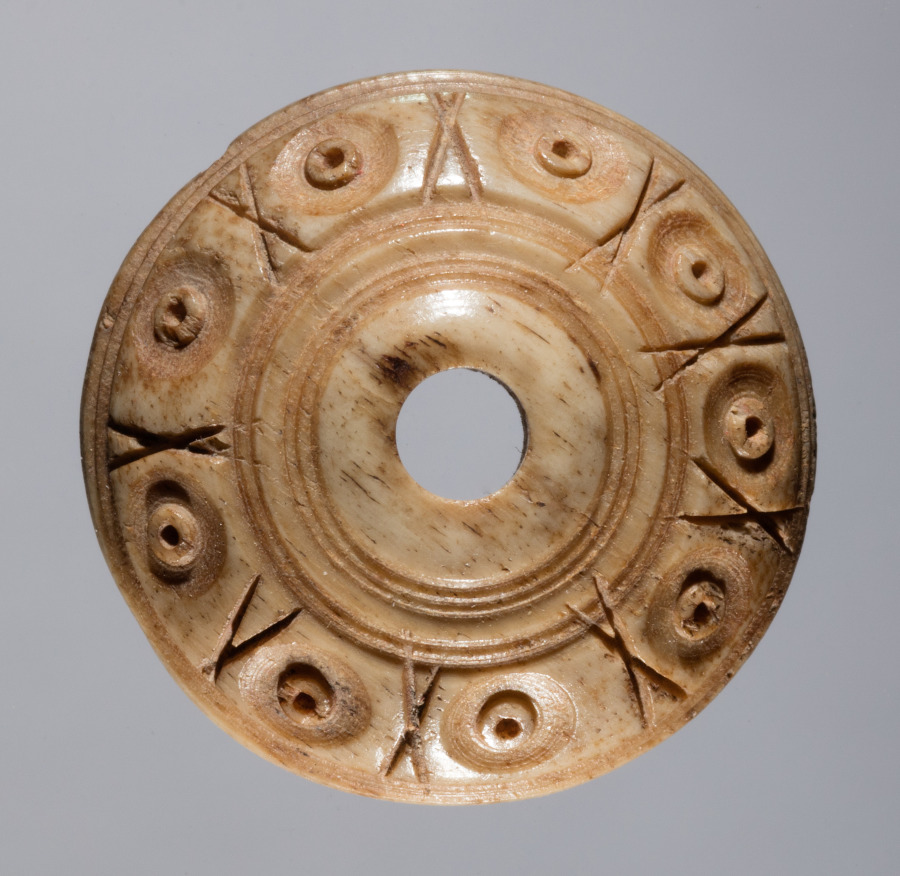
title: Spindle Whorl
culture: Iran, early Islamic period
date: 700s - 900s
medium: bone, incised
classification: Spindle Whorl